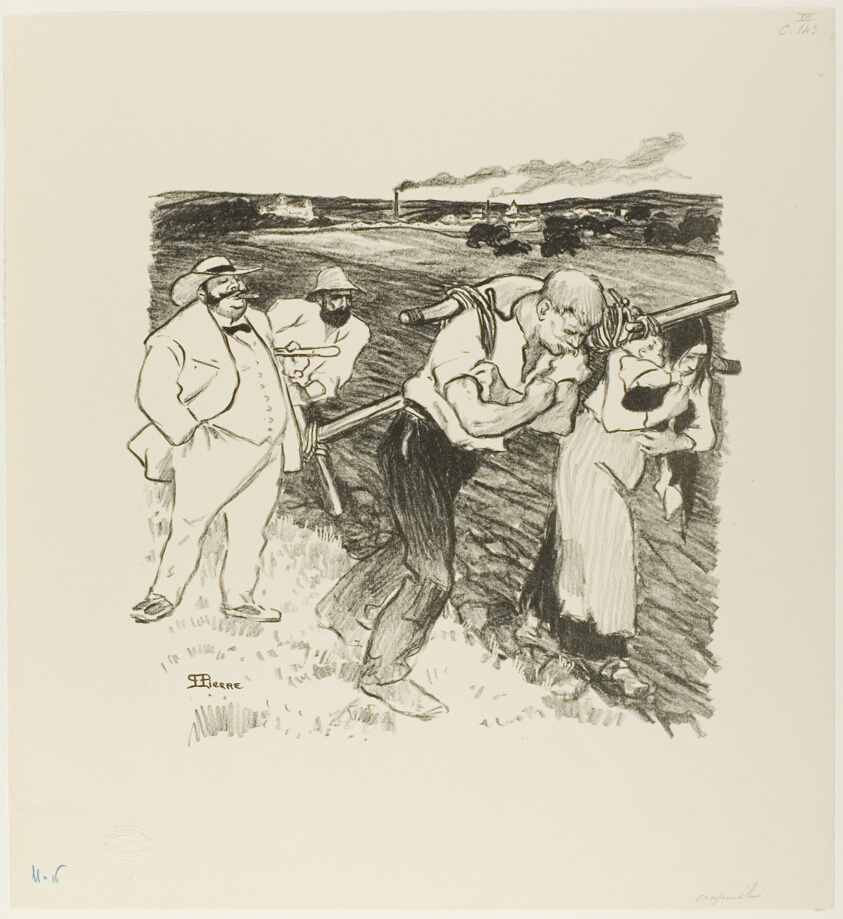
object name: Print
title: Today!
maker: Théophile-Alexandre Steinlen (French, born Switzerland, 1859-1923); printed by Edouard Kleinmann (French 1844-1927)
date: 1894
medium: Lithograph in black on ivory wove paper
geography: France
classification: lithograph; print; prints and drawing